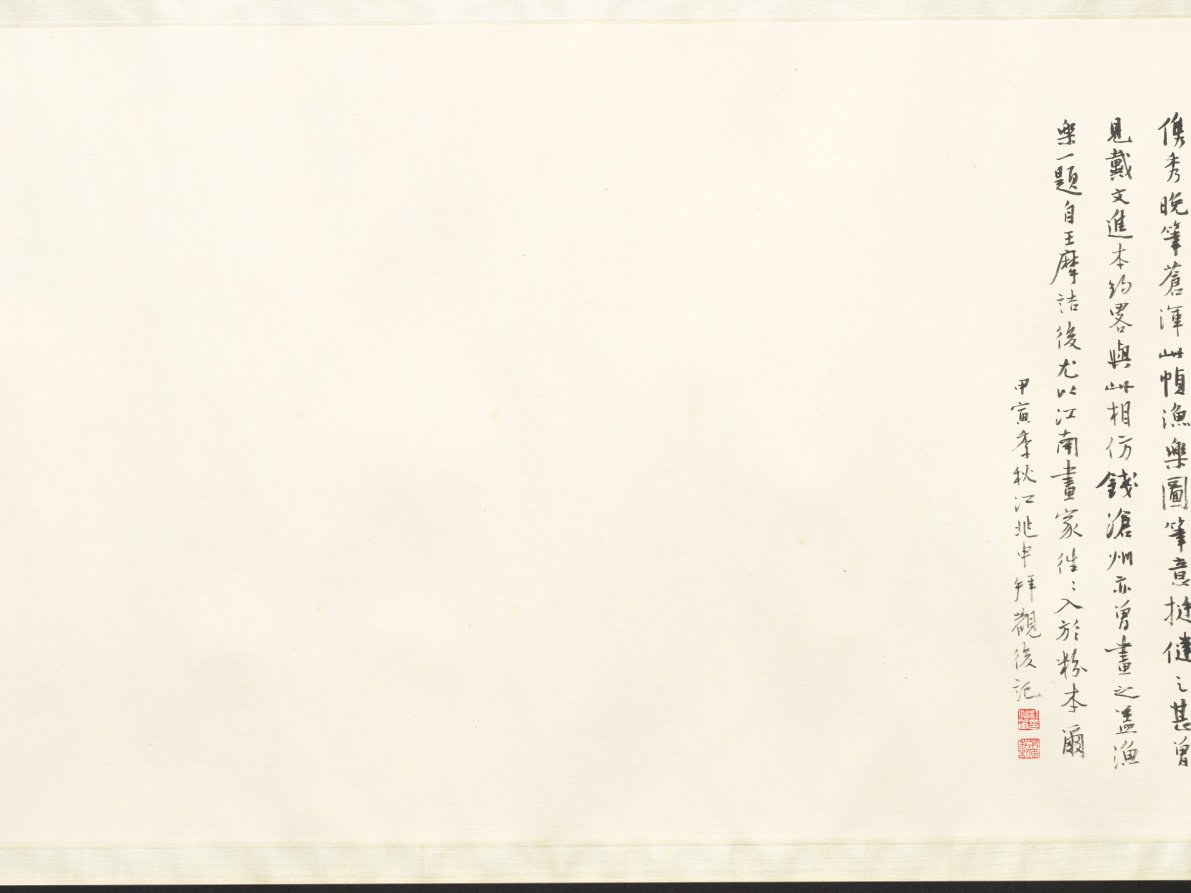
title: Fisherman's Joy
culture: China, Ming dynasty (1368–1644)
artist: Qian Gu (Chinese, 1508–c. 1578)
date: 1572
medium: Handscroll; ink and light color on paper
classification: Painting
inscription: Artist's inscription, signature, and seal: On the autumn day of the jen-shen year [1572], P'eng-ch'eng, Ch'ien Ku painted [this]. [seal] Hsüan-ch'ing shih. 2 colophons, both dated 1689, and 5 additional seals of Yün Shou-p'ing (1633-1690).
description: This painting has a scene showing two small crafts, each manned by two fishermen, practicing a traditional fishing method. In one of them, a man uses a bamboo pole to direct the movements of a cormorant bird sent into the water. Cormorant fishing, witnessed in some areas of the lower Yangzi River, appears in Zhe school paintings. Qian Gu may have borrowed these narrative figure scenes from Zhe school paintings, while his vantage point, brushwork, and soft tones align with the Wu school style. Scenes of fishermen appealed to urban and educated audiences who idealized the self-sufficient independence of fisherfolk.